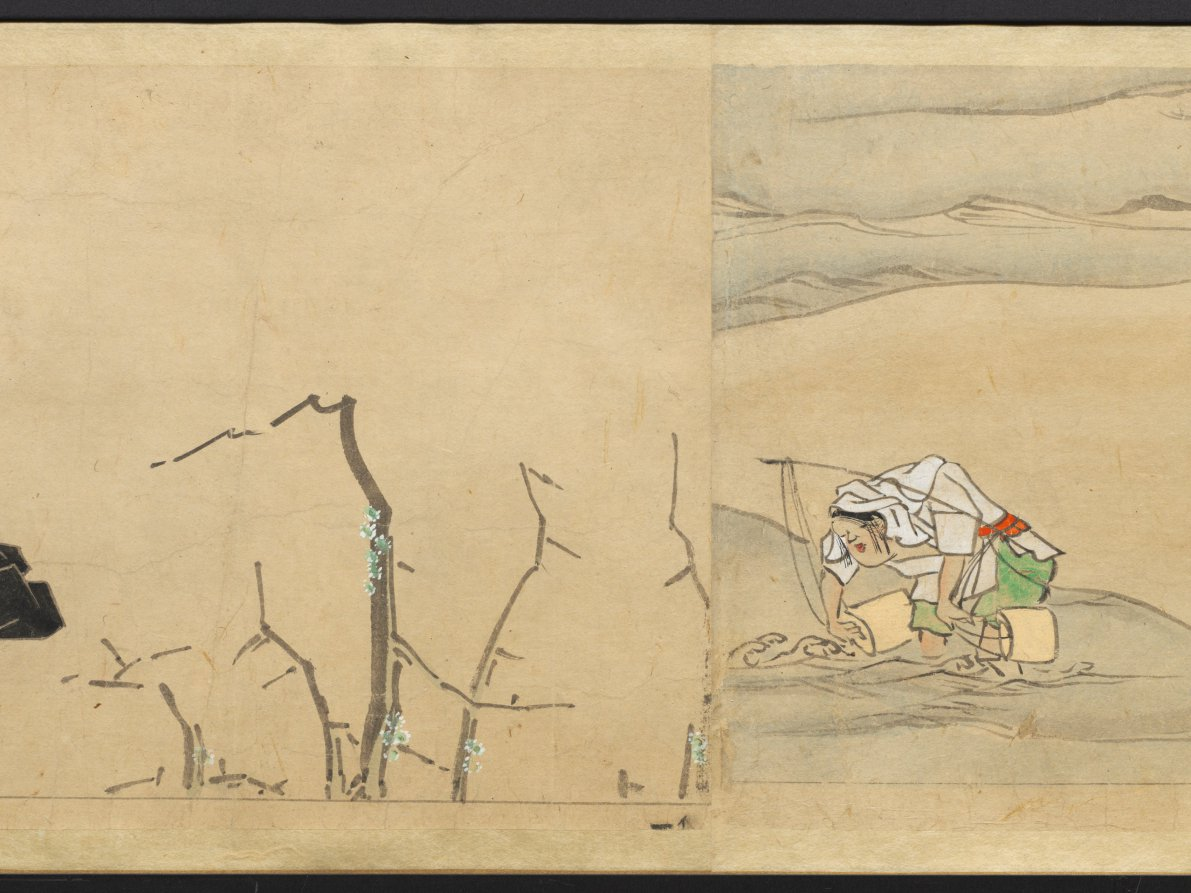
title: The Saltmaker's Story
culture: Japan, Edo period (1615–1868)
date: early 1600s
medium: One of a pair of handscrolls; ink, color, and gold on paper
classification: Painting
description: Once read and copied by girls at New Year’s celebrations and included in dowries, The Saltmaker’s Story is a rags-to-riches tale in which daughters are gifts from the gods. Despite his simple outlook, the main character progresses from humble roots as an associate at Kashima Shrine to the elite status of grandfather of the emperor through the intervention of the Kashima deity. The Saltmaker’s Story is traditionally presented in a set of three scrolls, but the text of this set has been removed by a previous owner, who remounted the illustrations as a pair. The paintings of this one take us from right to left through the first half of the tale.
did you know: This handscroll originally had texts before its paintings, but the texts were removed.